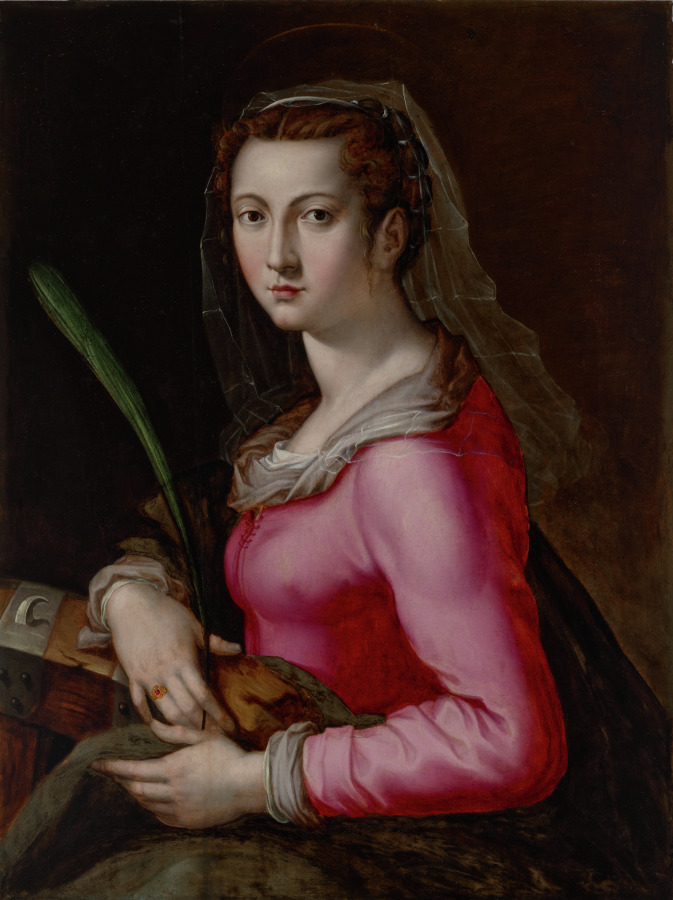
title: Portrait of a Woman as Saint Catherine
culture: Italy, 16th century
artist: Pier Francesco Foschi (Italian, 1502–1567)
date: c. 1560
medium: oil on wood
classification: Painting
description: Saint Catherine of Alexandria, a Christian, was martyred for refusing to make sacrifices to idols as decreed by the pagan Roman emperor Maxentius. While Maxentius first attempted to slay Catherine with spiked wheels, the machine broke when she prayed for salvation, and the emperor subsequently beheaded her. Catherine is identified in portraits through objects related to her martyrdom, such as a broken wheel, or a palm branch symbolizing the victory of the eternal spirit over mortal flesh. In sixteenth-century Florence, patrician women were often portrayed as such exemplary figures, indicating the virtues of the sitter.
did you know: The spiked wheel identifies this woman as the Christian martyr Saint Catherine.